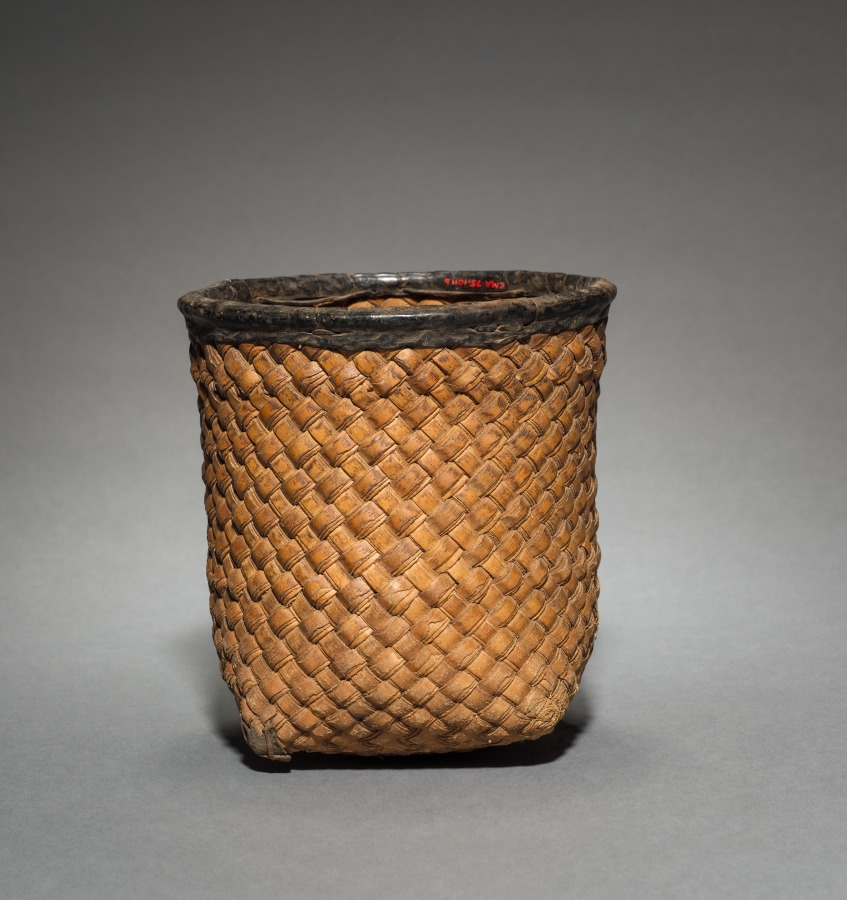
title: One of Ten Nesting Wedding Baskets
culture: Africa, Western Africa, Burkina Faso, Lobi–style maker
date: c. 1900s?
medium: Plant fiber and leather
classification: Vessels